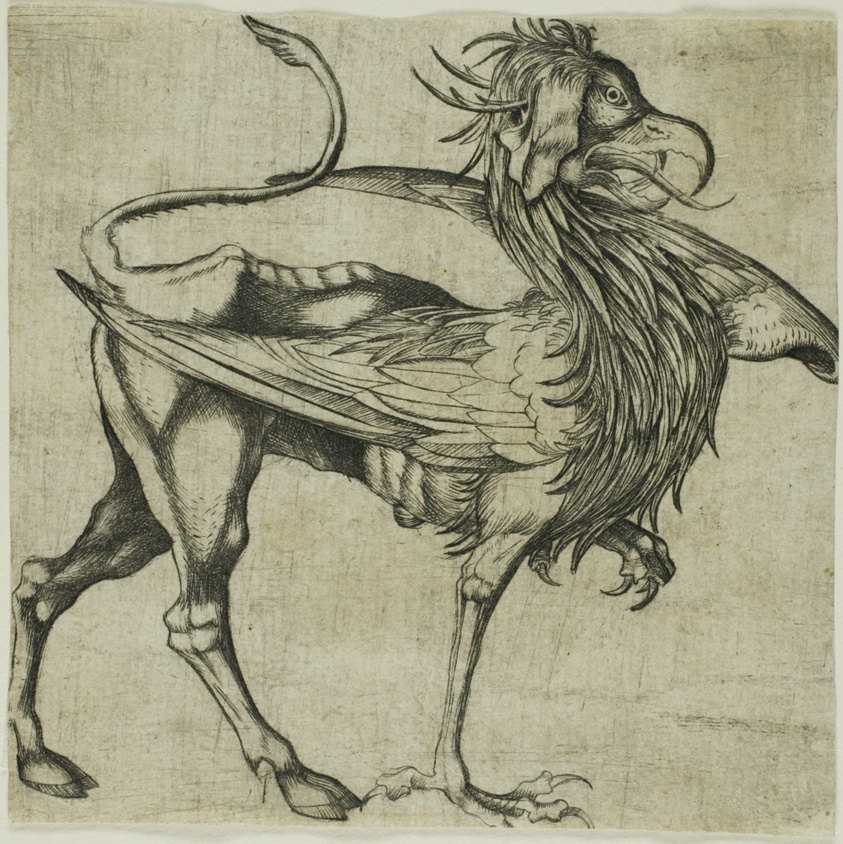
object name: Print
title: The Griffin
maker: After Martin Schongauer; German, c. 1430/50-1491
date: c. 1485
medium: Engraving on buff laid paper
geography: Germany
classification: engraving; print; prints and drawing